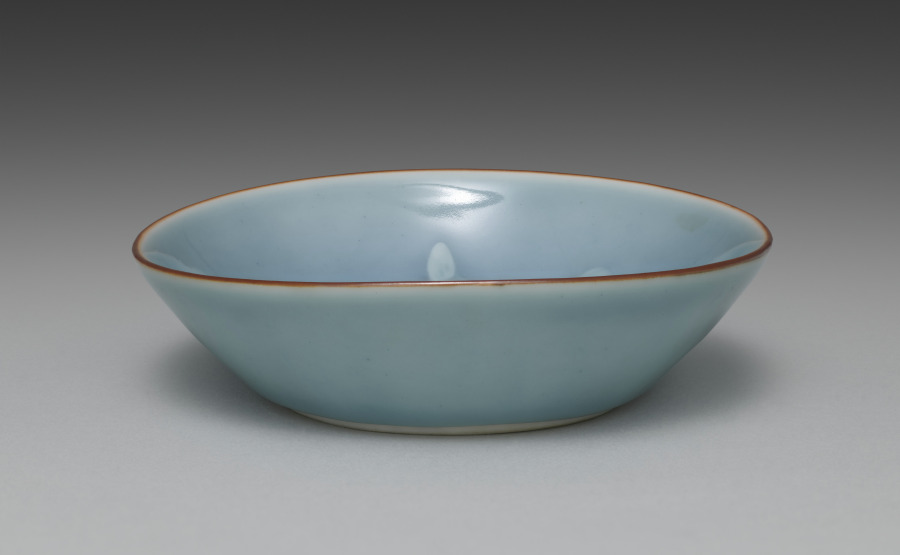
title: Dish from Dishes with Shells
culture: Japan, Taishō period (1912–26)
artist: Seifū Yohei IV (Japanese, 1872–1951)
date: 1914–46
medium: One from a set of five dishes; porcelain with blue glaze, iron oxide, and molded design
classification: Ceramic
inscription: 清風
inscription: 清風造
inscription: 清風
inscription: 成山清風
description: Yohei IV chose an aquatic theme for this set of five mukōzuke, side dishes. He added an iron oxide rim and used a concentrated blue glaze on both the interior and exterior. The glaze, named on the box lid, is his father’s “evening moon” (tsukiyoi) color. The conch in relief takes up the entire bottom of the dish. Up the sides are two snails on one end and on the other a scallop. This results in a boldly graphic, less realistic effect.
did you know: This set of dishes, mukōzuke, could be used for serving small side dishes at a tea gathering.